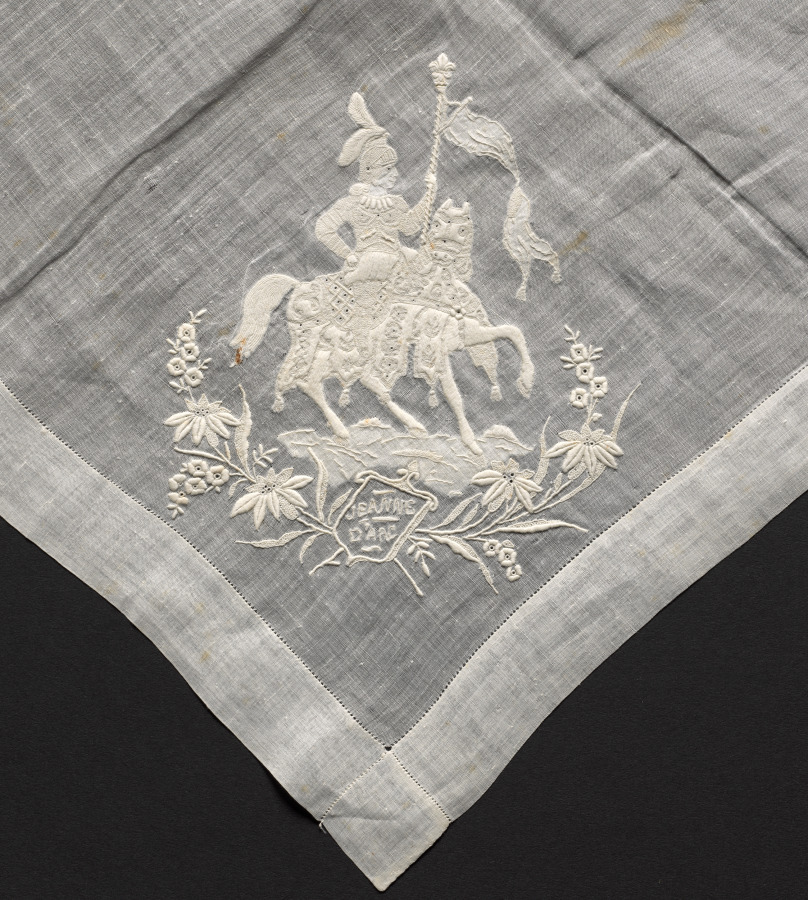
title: Embroidered Handkerchief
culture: Switzerland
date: 1800s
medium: linen: embroidery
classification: Embroidery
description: This handkerchief is embroidered with the figure of Joan of Arc on horseback in one corner.